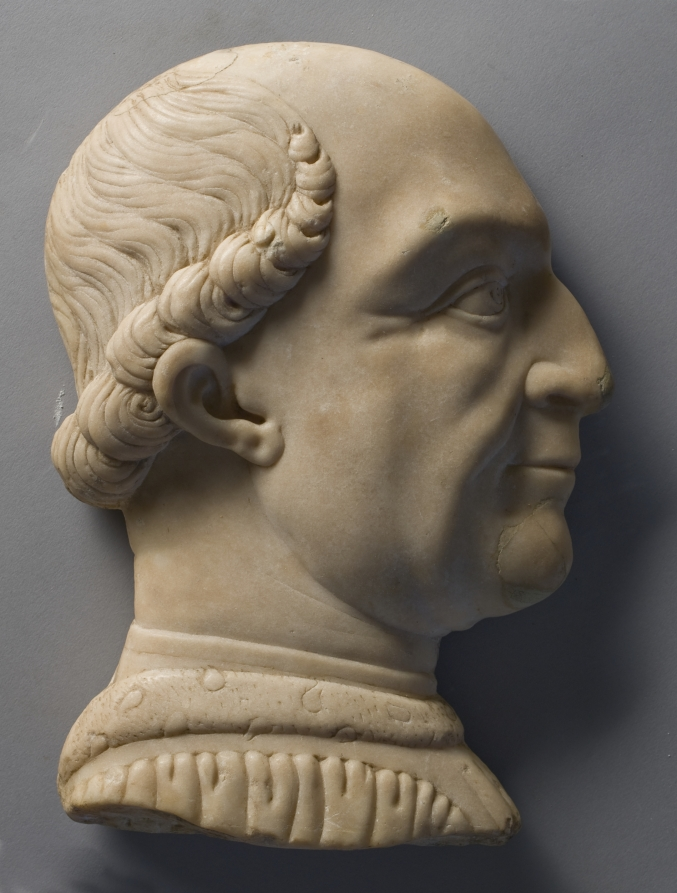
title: Portrait of Francesco Sforza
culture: Italy, Lombardy, 15th century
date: 1450–1499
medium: marble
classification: Sculpture